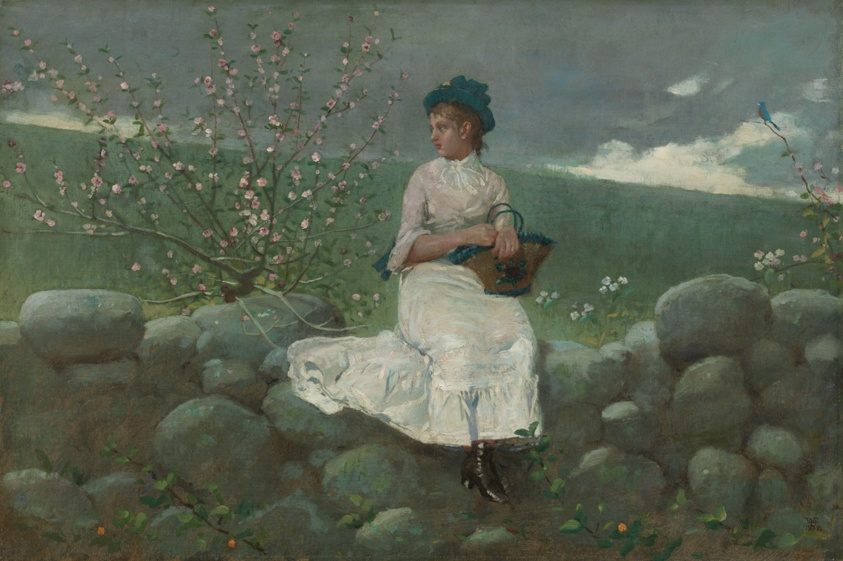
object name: Painting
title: Peach Blossoms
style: Impressionism, Realism, Modernism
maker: Winslow Homer (American, 1836–1910)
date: 1878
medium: Oil on canvas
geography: United States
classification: painting; american arts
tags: people, fashion, landscapes, portraits